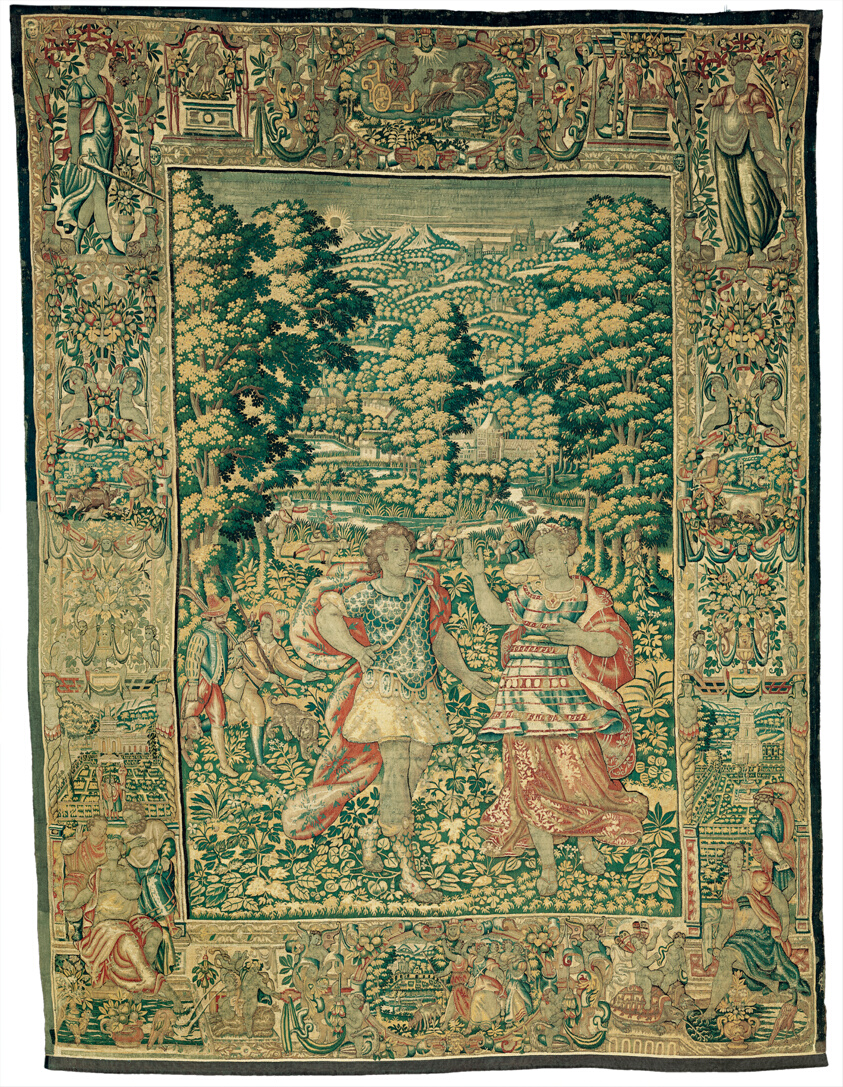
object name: Textile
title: Venus and Adonis (?) with the Duck Hunt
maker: Presumably woven at the workshop of Jacques I Geubels (died 1601/05) or his widow Catharina van den Eynde (died before 1629); Flanders, Brussels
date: c. 1600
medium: Wool and silk, slit and double interlocking tapestry weave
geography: Flanders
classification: weaving - tapestry; textile